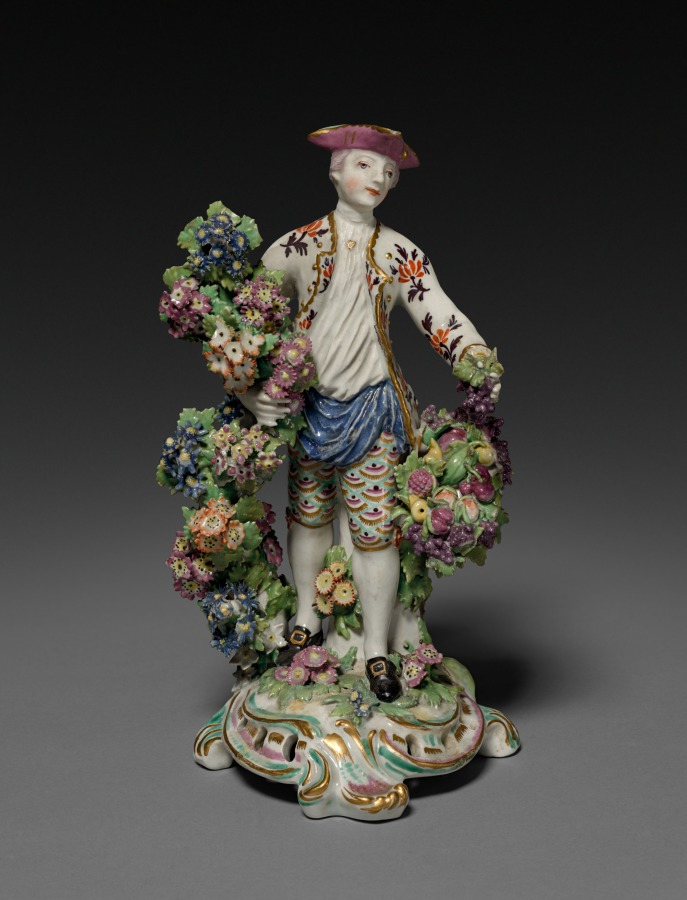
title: Figure of a Gardener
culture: England, London, Bow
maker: Bow Porcelain Factory (British)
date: c. 1765–70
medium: soft-paste porcelain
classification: Ceramic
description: Even though this figure and his counterpart (1945.36) are not accompanied by a sheep, these ceramic sculptures were sometimes known as “Garland Shepherds” during the mid-1700s. The name derived from a similar set produced by one of the Bow Porcelain Factory’s rivals, the Derby Porcelain Factory, in which the male figure holds a lamb. While these two factories often produced similar sets of pastoral, allegorical, biographical, and religious figures, the Bow Factory was known as one of the preeminent porcelain manufacturers, rivaled only by the Chelsea Porcelain Factory, with which Bow would later merge.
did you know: Due to the abundance of grapes, pears, plums, and other fall fruits spilling from the figure’s basket, this Gardener has also been considered a personification of Autumn.